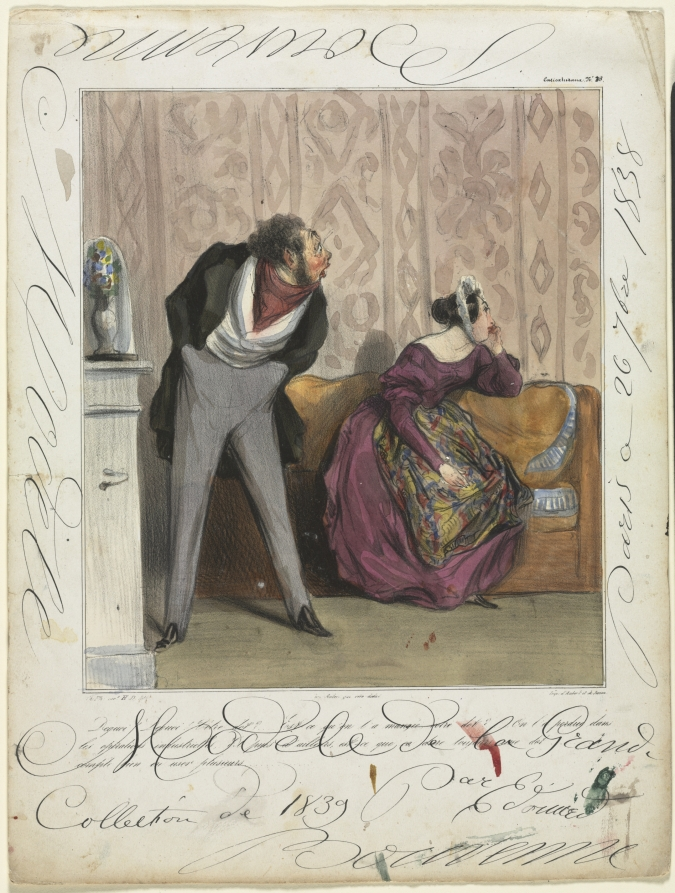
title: From What! From What! Your Dowry?...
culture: France, 19th century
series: Caricaturana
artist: Honoré Daumier (French, 1808–1879)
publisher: Aubert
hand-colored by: Edouard Bouvenne (French)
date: 1837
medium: lithograph hand-colored with watercolor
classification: Print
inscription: Inscribed in the margins on all four sides of the image, pen and ink: Modèle de la Grande Collection de 1839 par Edouard Bouvenne/ Paris a 26 7bre/ Bouvenne/ Modèle.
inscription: Lower margin, printed: Ch. Ph. invt. H.D. lith. / Chez Aubert, gal. véro dodat. / Imp. d'Aubert et de Junca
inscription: Above image, printed: Caricaturana No. 36 ; below the image. printed: "Dequoi! Dequoi! Votre dot?..... Est-ce qu'on l'a mangée, votre dot?...... On l'a perdue dans / les opérations industrielles. Et puis d'ailleurs, est-ce que ça dure toujours une dot....... Je / compte bien en user plusieurs..........."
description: This print was published in Le Charivari (March 19, 1837) as plate 36 from the series Caricaturana.